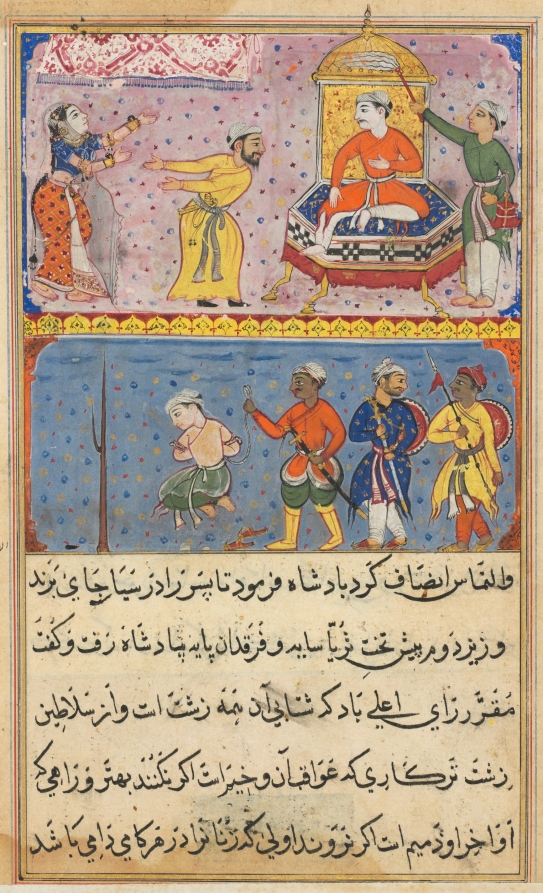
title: The prince, once reprieved, is returned to the palace of execution a second time on the plea of the king’s handmaiden, from a Tuti-nama (Tales of a Parrot): Eighth Night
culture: Mughal India, court of Akbar (reigned 1556–1605)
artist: Gujarati (Indian, active 1550s-1590s)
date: c. 1560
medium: gum tempera, ink, and gold on paper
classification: Painting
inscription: aiẓan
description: Above, the handmaiden addresses the king, who is seated on a large throne. She begs once again for the prince to be executed for a crime he did not commit. In the lower register, the bound prince kneels, barefoot and surrounded by armed guards. His execution will be stopped for the second time by one of the king’s viziers.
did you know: The vizier tells the king a story about the wicked ways of women.